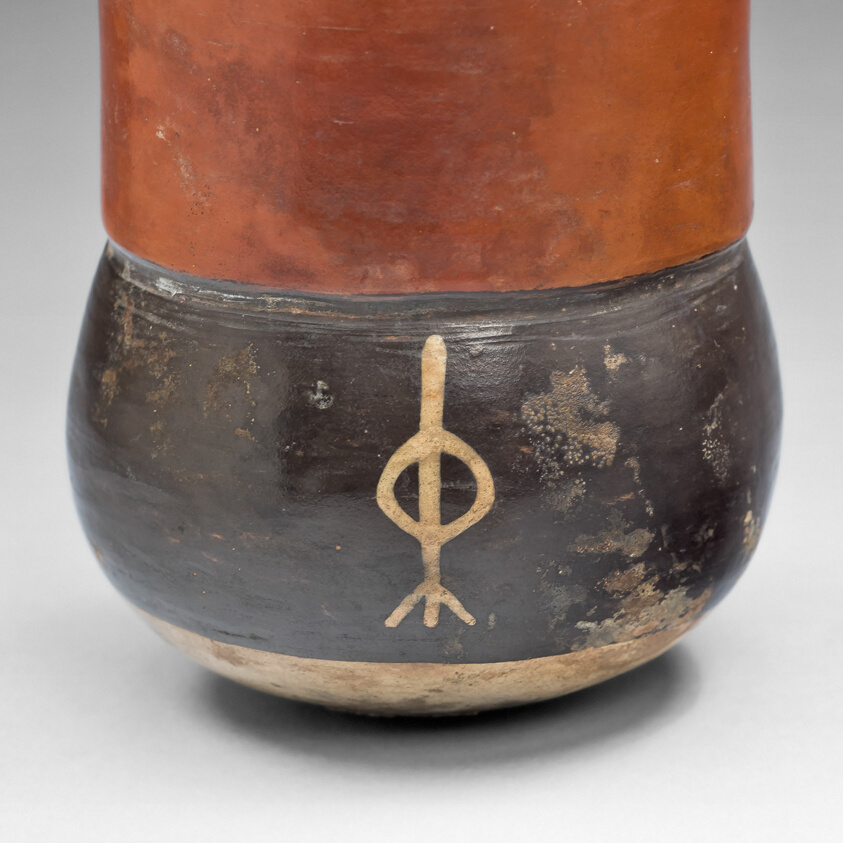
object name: Vessel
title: Beaker in the Form of a Trophy Head with Bound Lips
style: nazca, early intermediate period, Pre-Columbian, americas, Arts of the Americas, andean, andes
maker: Nazca; South coast, Peru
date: 180 BCE–500 CE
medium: Ceramic and pigment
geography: Peru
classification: earthenware; art of the americas; ceramics; vessel